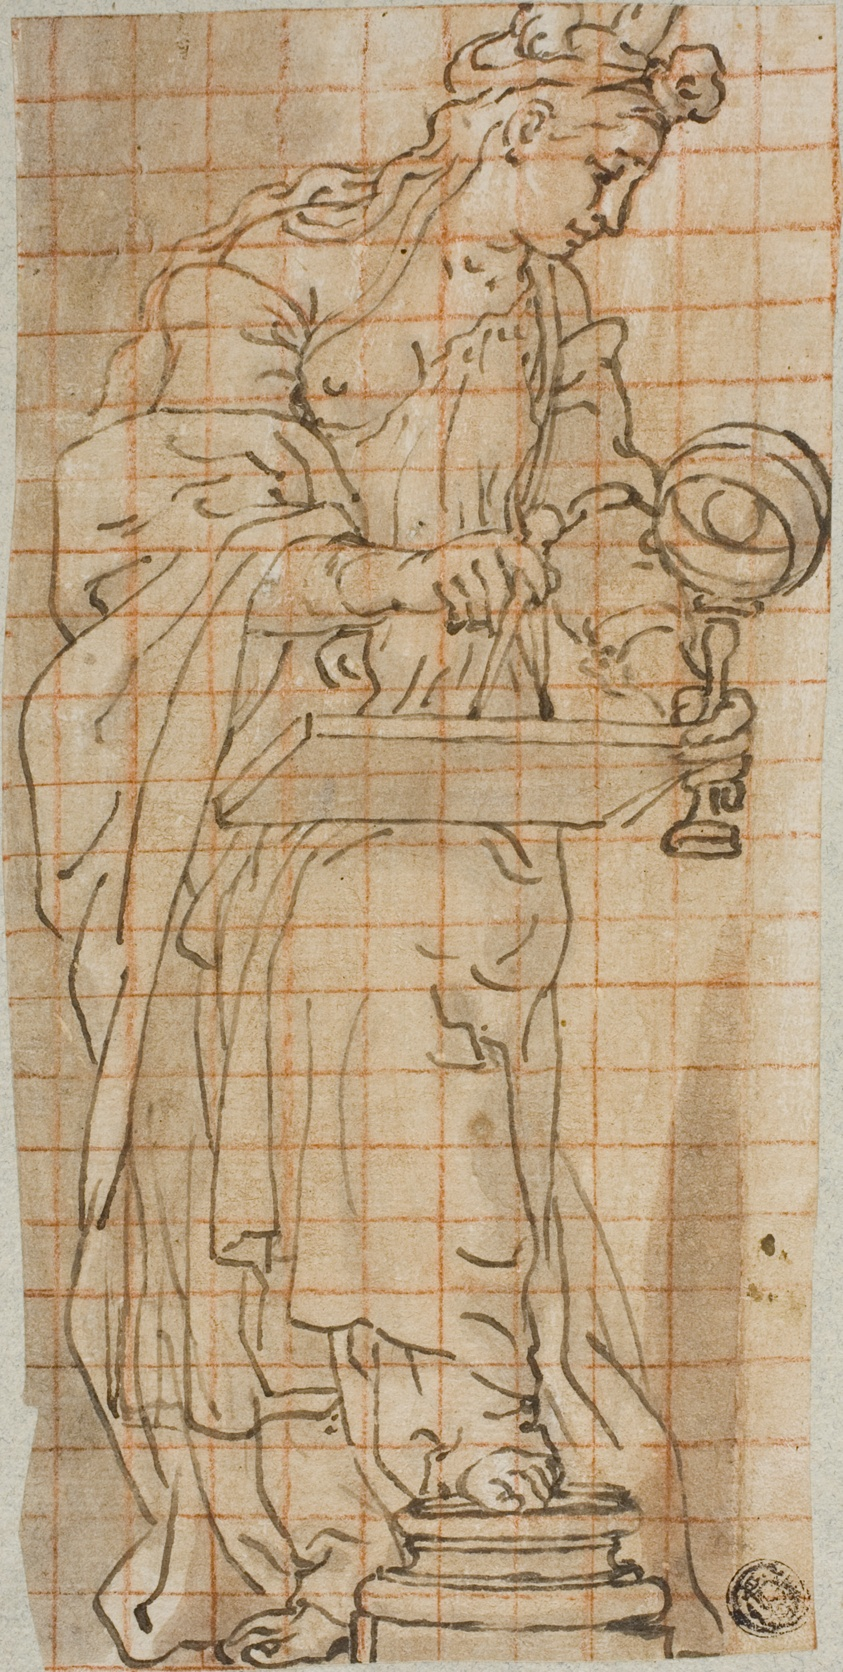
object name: Drawing and Watercolor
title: Allegory of Geometry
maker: Andrea Lilio (Italian, c. 1555-1610)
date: c. 1600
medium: Pen and brown ink with brush and brown wash, squared in red chalk, on ivory laid paper, laid down on blue laid paper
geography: Italy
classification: pen and ink drawings; drawings (visual works); prints and drawing